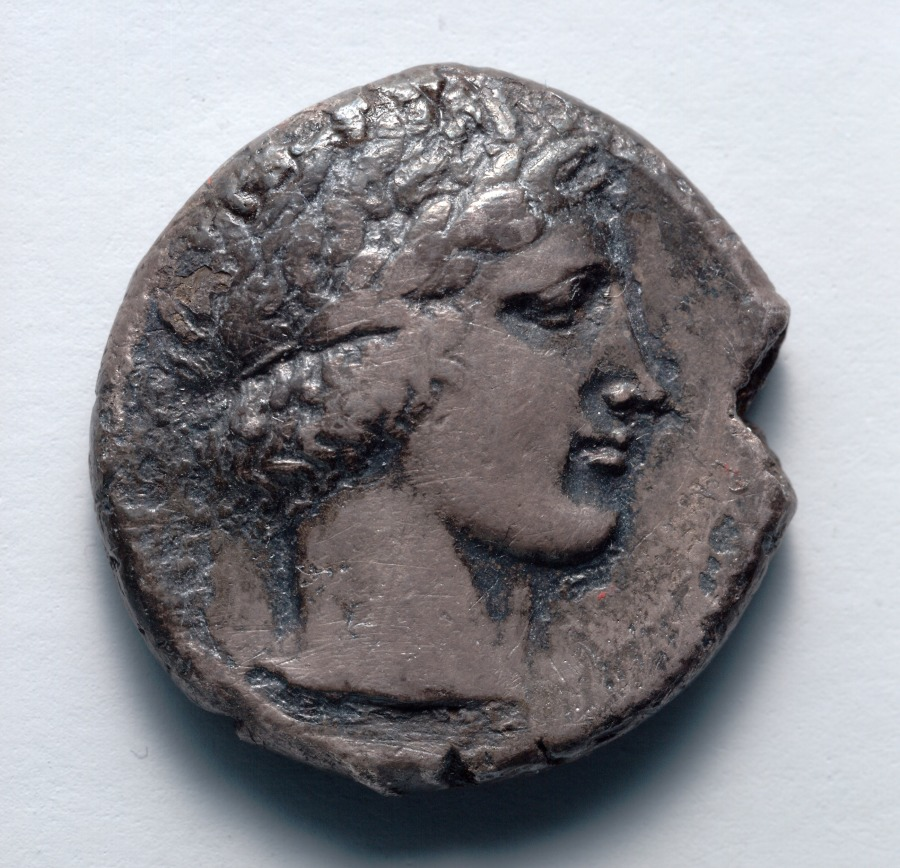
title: Tetradrachm: Head of Apollo (obverse); Head of Lion (reverse)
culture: Greek, minted at Leontinoi (Sicily)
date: 466–422 BCE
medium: silver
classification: Coins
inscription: [ΛΕ]Ο[ΝΤ]ΙΝΟΝ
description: The lion, king of the beasts and an animal associated with regal and heroic power, featured prominently on the coinage of many ancient Greek city-states. Artists placed the lion in a variety of poses, sometimes including the whole body, at other times the foreparts or just the head. Although it may once have roamed nearby, for many Greeks the lion was a monster nearly as exotic as the Chimaera, of which it formed a part, together with a goat head and snake-headed tail.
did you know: The lion on coins of Leontini marks a pun on the city name.